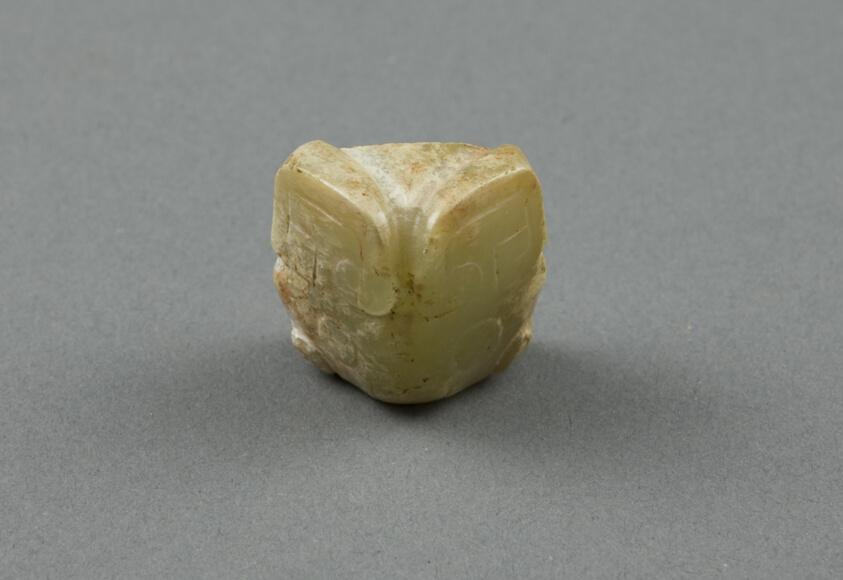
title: Pendant, animal mask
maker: China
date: Early Western Zhou dynasty (1047BC-772BC)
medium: Jade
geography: China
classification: jade; asian art